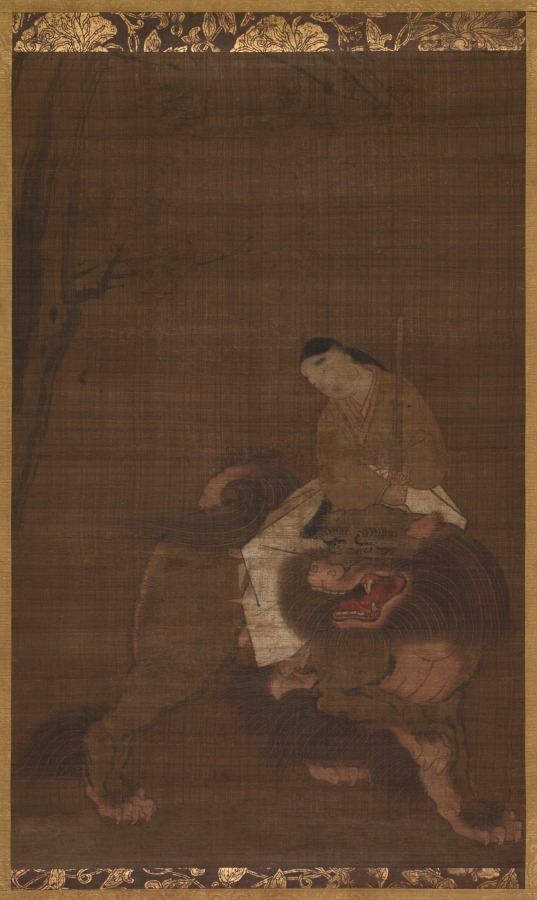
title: Monju as a Child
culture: Japan, Muromachi period (1392–1573)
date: 1400s–1500s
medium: hanging scroll; ink and color on silk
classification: Painting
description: In this work, a young boy dressed in Japanese court costume holds a sword and sacred text, symbols of wisdom carried by the bodhisattva Monju, and rides a lion, also associated with that Buddhist deity. As boy and lion pass beneath a sketchily inked tree, the lion pauses, right foreleg suspended in midair, and the pair looks back. The relatively naturalist posing and sensibility of the painting, as well as the boy’s attire, suggest the possibility that he is a manifestation of a Wakamiya, a youthful kami (a Japanese deity), whose Buddhist counterpart is Monju.